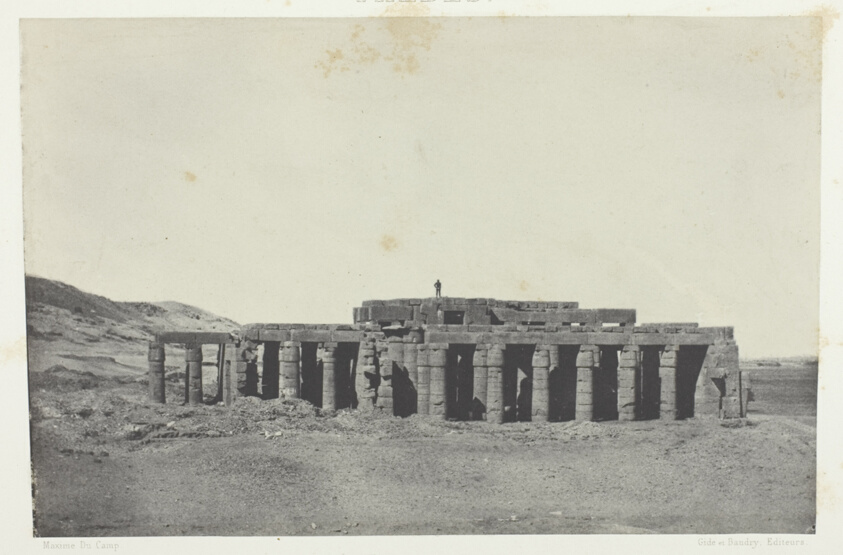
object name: Photograph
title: Gournah, Tombeau d'Osymandias; Thèbes, plate 58 from the album "Egypte, Nubie, Palestine et Syrie" (1852)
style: 19th century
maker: Maxime Du Camp (French, 1822–1894)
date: 1849/51, printed 1852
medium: Salted paper print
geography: France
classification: salted paper print; photographic process; photography; photograph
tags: Collected by Hugh Edwards, Egypte, Nubie, Palestine et Syrie